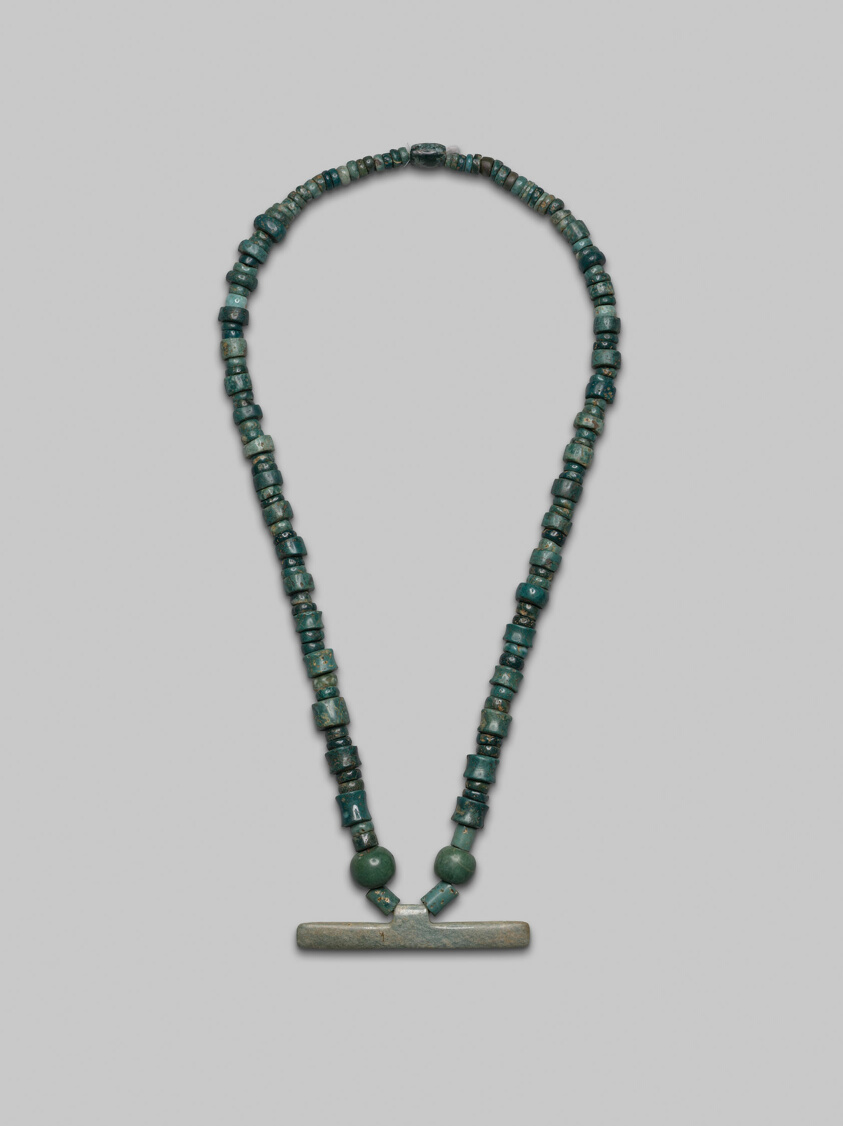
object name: Costume and Accessories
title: Beaded Necklace with Bar Pendant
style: nicoya, americas, lower central america, Arts of the Americas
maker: Nicoya (Nicoya, Guanacaste province, Costa Rica)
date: 300–700 CE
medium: Jade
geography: Costa Rica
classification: jewelry; pendant (jewelry); stone; art of the americas; costume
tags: jewelry